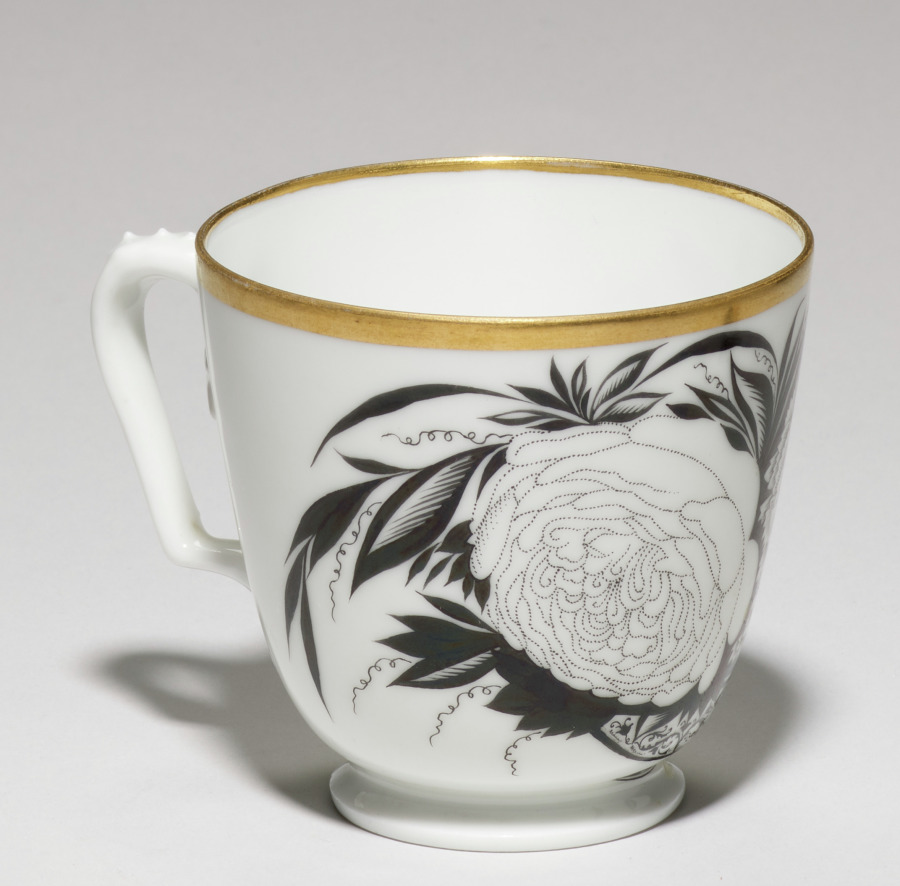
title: Cup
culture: Russia, St. Petersburg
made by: St. Petersburg Imperial Porcelain Factory (Russian)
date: 1881–1917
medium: porcelain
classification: Ceramic